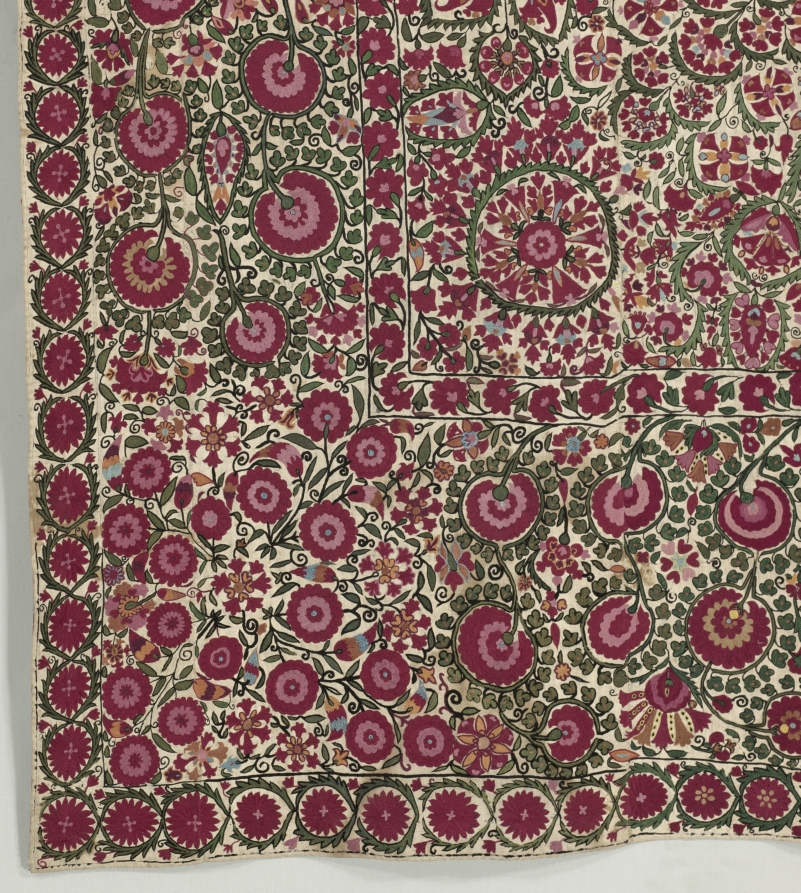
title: Curtain or bedcover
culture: Tajikistan, Ura Tube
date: early 1800s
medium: plain weave: cotton; embroidery: silk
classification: Embroidery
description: Known as suzani, embroideries with elaborate floral decoration from Central Asia were a significant part of a bride’s dowry and were ceremoniously displayed on special occasions. Women embroidered suzani, mothers passing their skills on to their daughters. Floral and foliate motifs generally dominate, emboldened with several shades of red and multiple borders, perhaps conveying cosmological, medicinal, or fertility associations. However, few display a more bountiful blossoming garden than seen here. Flora radiates from the central fanlike bouquet, a design echoed in the corners of the field and in the wide border, characteristic of work from Bukhara, Uzbekistan. Patterns were drawn on several loosely joined cotton cloths and then embroidered in chain stitch.